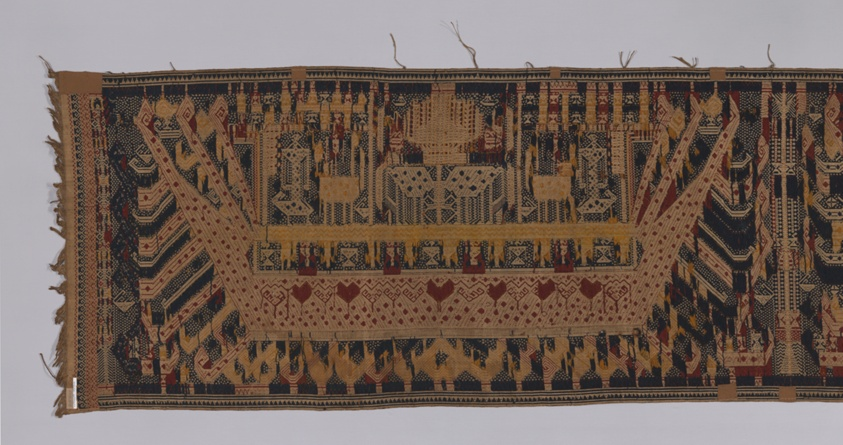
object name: Religious/Ritual Object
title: Ceremonial Hanging (palepai)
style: indonesian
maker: Paminggir people; Indonesia, South Sumatra, Lampung area, Kalianda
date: 19th century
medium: Cotton, silk, and silver-leaf-over-lacquered-paper-strip-wrapped bast fiber (probably ramie), plain weave with supplementary patterning and brocading wefts, main warp fringe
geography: Indonesia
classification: textile; weaving; ritual objects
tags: boats, figures (representations), seas, waves